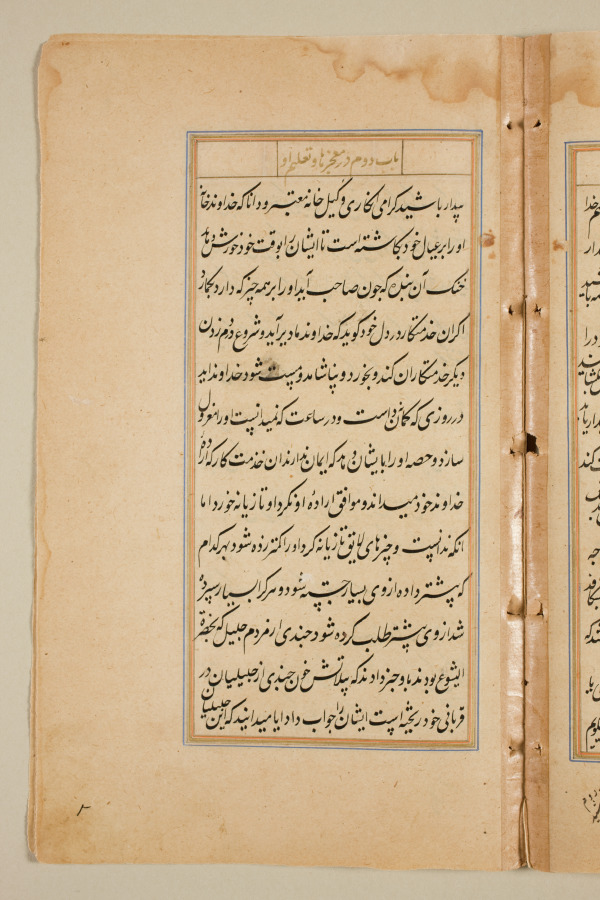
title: Text page from a Mirror of Holiness (Mir’at al-quds) of Father Jerome Xavier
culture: Mughal India, Allahabad, made for Prince Salim (1569–1627)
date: 1602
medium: Ink and gold on paper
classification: Manuscript